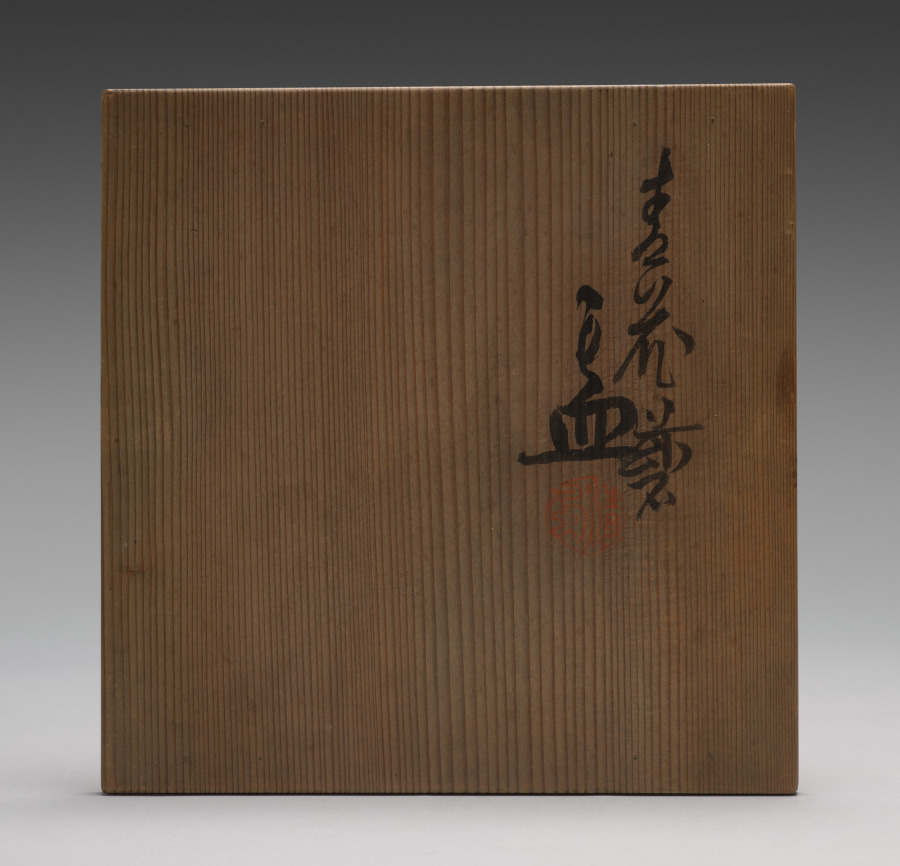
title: Dining Bowl with Clematis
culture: Japan, Meiji period (1868–1912)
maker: Seifū Yohei III (Japanese, 1851–1914)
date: 1893–97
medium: Porcelain with underglaze and overglaze colors, molded and incised designs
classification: Ceramic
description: The bowl is an especially well-executed example of Yohei III’s work in underglaze blue combined with other underglaze colors. This low-profile dining bowl has paintings of flowering clematis vines under the glaze in blue and red. Water is depicted with blue in the bottom of the bowl. The lines of white used to show motion on the water’s surface were created using either a reserve technique, where blue was omitted, or a masking technique, where parts of the surface were covered before applying the blue. A pair of butterflies flutters across one side. The foot is decorated with a pattern of spirals in blue, and the lip curves in slightly. The overall effect is one of seeing the flowering vine hanging down, hovering just above the surface of a pond, whose slight disturbances hint at unseen fish swimming below.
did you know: This bowl shows an environment painted in the round.